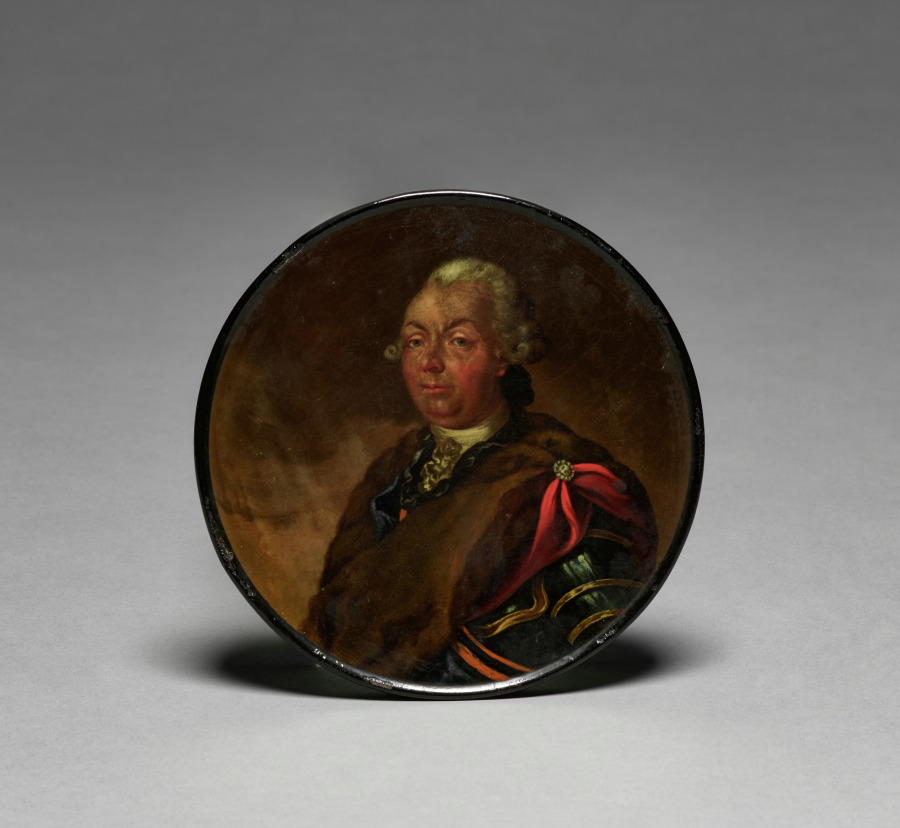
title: Cover for a Box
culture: Germany, late 18th Century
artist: possibly studio or workshop of Johann Heinrich Stobwasser (German, 1740–1829)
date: late 1700s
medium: lacquered wood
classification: Miscellaneous